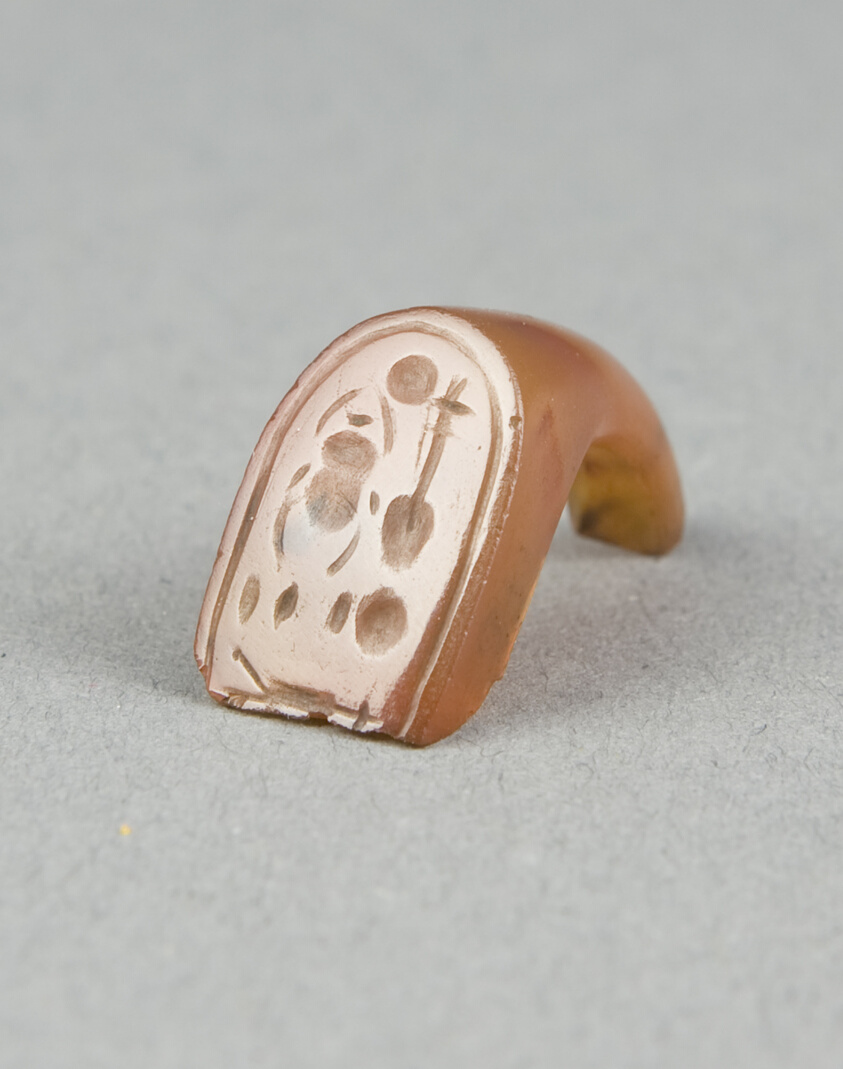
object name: Costume and Accessories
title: Finger Ring: Neferkheprure-Wanre (Akhenaton)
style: eighteenth dynasty, new kingdom, egyptian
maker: Egyptian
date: New Kingdom, Dynasty 18, reign of Akhenaten (about 1352–1336 BCE)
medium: Carnelian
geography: Egypt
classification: stone; jewelry; ancient art; costume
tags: pharaohs